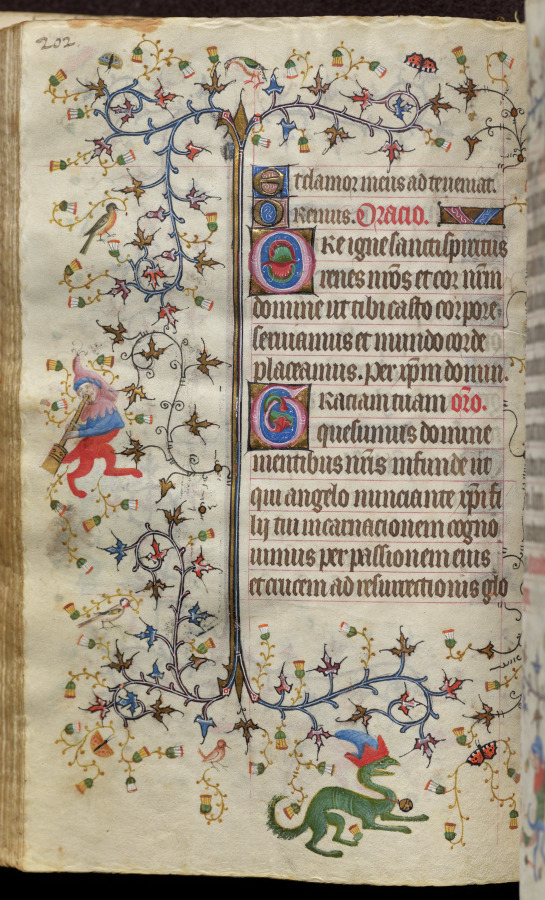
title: Hours of Charles the Noble, King of Navarre (1361-1425): fol. 101v, Text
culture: France, Paris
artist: Master of the Brussels Initials and Associates (French)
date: c. 1405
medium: ink, tempera, and gold on vellum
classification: Bound Volume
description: This precious volume was obviously highly prized by its owner, the French-born King of Navarre, who had his coat of arms painted on no less than twenty folios. Rather than directly commissioning this manuscript from a specific workshop, it seems that Charles the Noble acquired his book of hours -- perhaps ready-made for the luxury market -- while on a trip to Paris in 1404-05. A collaborative effort, six painting styles are evidenced within the pages of this codex, those of two Italians, two Frenchmen, and two Netherlanders. The painter who was responsible for the planning and decoration of the book, and who produced seventeen of the large miniatures, was a Bolognese artist known as the Master of the Brussels Initials. His principal assistant, responsible for most of the borders, was a Florentine who signed his name "Zecho" da Firenze on folio 208 verso.